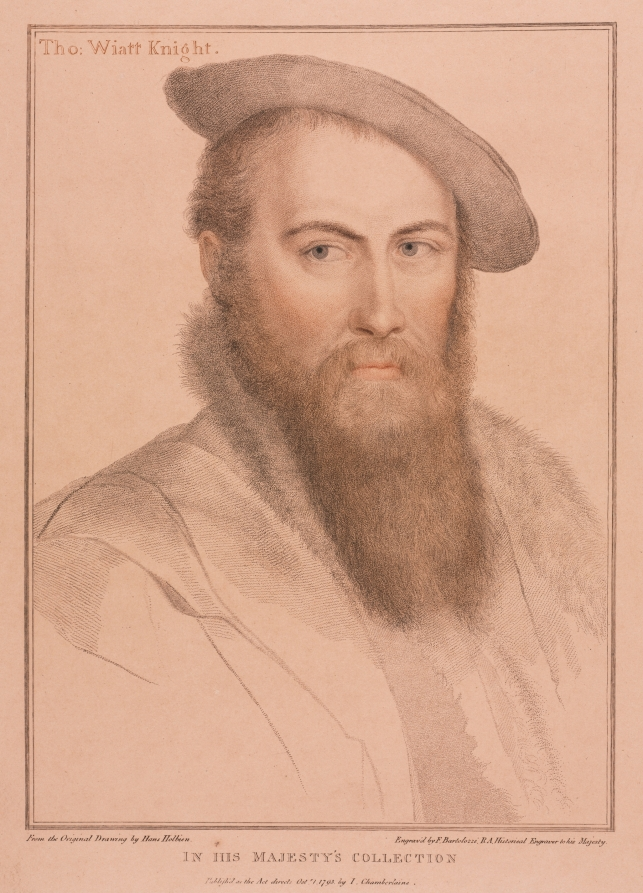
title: Sir Thomas Wyatt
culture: England, 18th Century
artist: Francesco Bartolozzi (British, 1727–1815)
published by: John Chamberlaine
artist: after Hans Holbein (German, c. 1465–1524)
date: 1793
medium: color stipple engraving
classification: Print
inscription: On pink page: "1793"